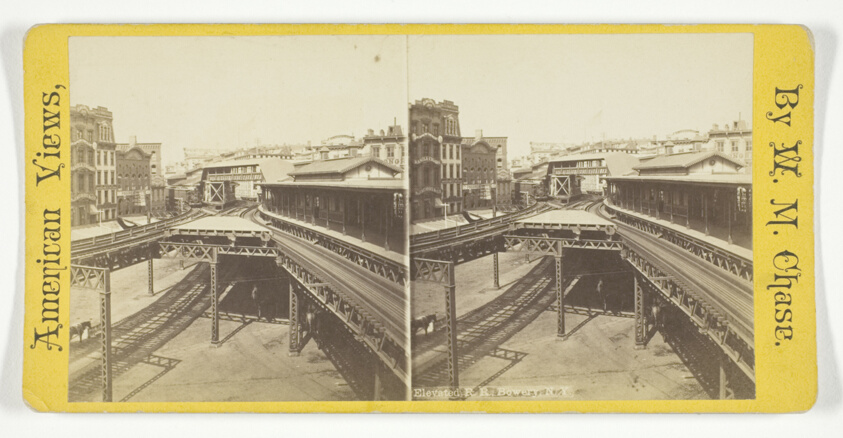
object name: Photograph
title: Elevated R.R. Bowery, N.Y.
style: 19th century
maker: W. M. Chase; American, 1817-1901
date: Late 19th century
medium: Albumen print, stereo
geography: New York City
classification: photography; photograph; albumen silver print; stereograph (albumen)